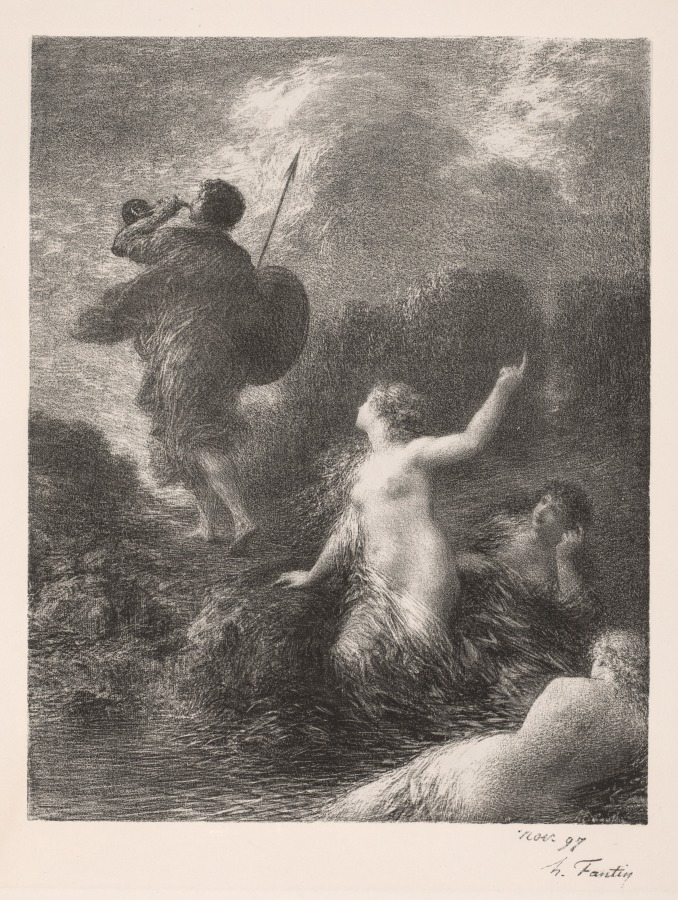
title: Twilight of the Gods: Siegfried and the Rhine Maidens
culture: France, 19th century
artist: Henri Fantin-Latour (French, 1836–1904)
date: 1897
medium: lithograph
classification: Print